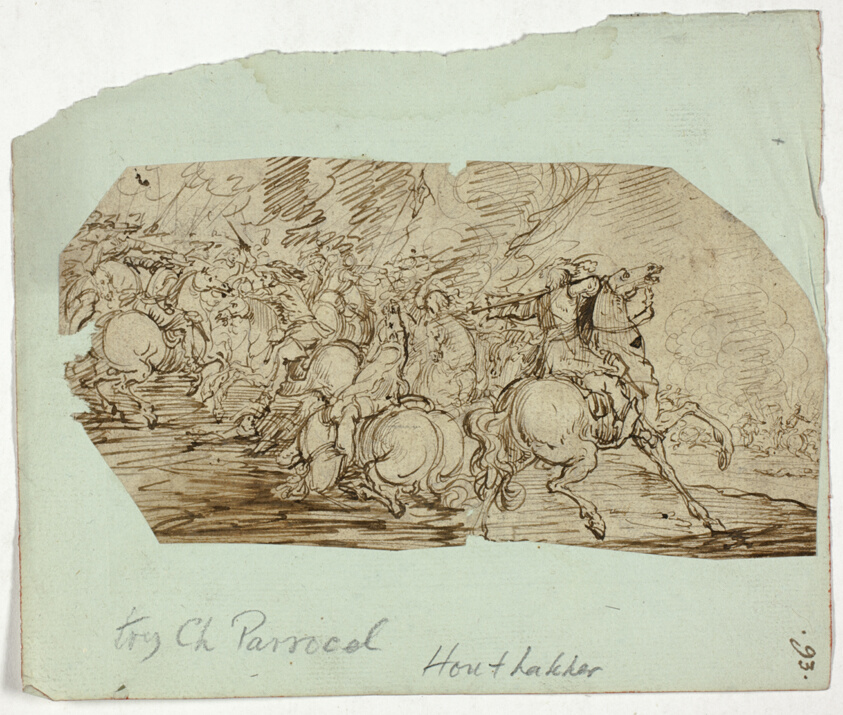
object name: Drawing and Watercolor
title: Cavalry Battle Scene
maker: Unknown Artist; French or Italian, early 16th century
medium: Pen and brown ink on ivory wove paper, tipped onto blue laid paper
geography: France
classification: pen and ink drawings; drawings (visual works); prints and drawing